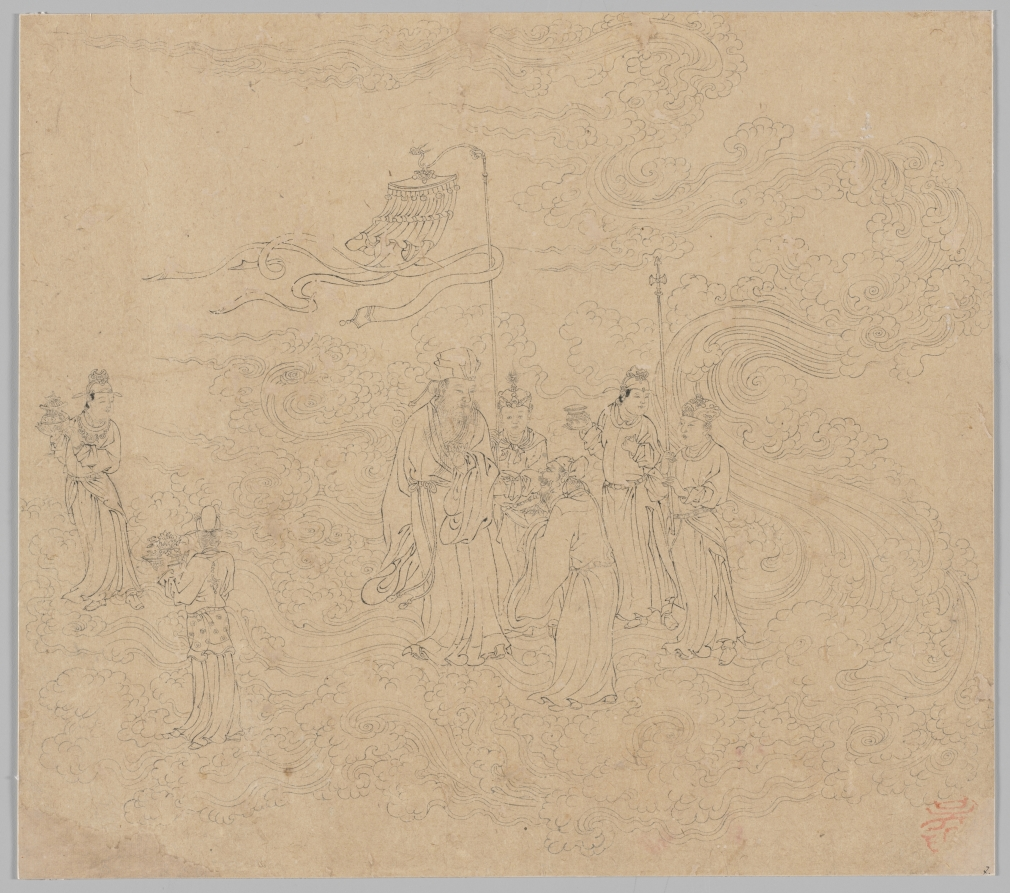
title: Album of Daoist and Buddhist Themes: Procession of Daoist Deities: Leaf 7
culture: China, Southern Song dynasty (1127-1279)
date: 1200s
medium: Album, ink on paper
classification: Painting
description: This extraordinary album has 50 paintings on a variety of religious subjects. They were likely created by several master craftsmen to share with studio apprentices as models for fulfilling commissions. The Jade Emperor and the Daoist pantheon make up the first 26 leaves. The next 14 leaves portray the Buddhist Ten Kings of Hell administering punishments to the dead. The third section, called “Clearing the Mountains,” features divine soldiers, led presumably by the deity Erlang Shen 二郎神, fighting undesirable creatures.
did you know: Six attendants escort a divine lord, likely one of the Five Emperors.